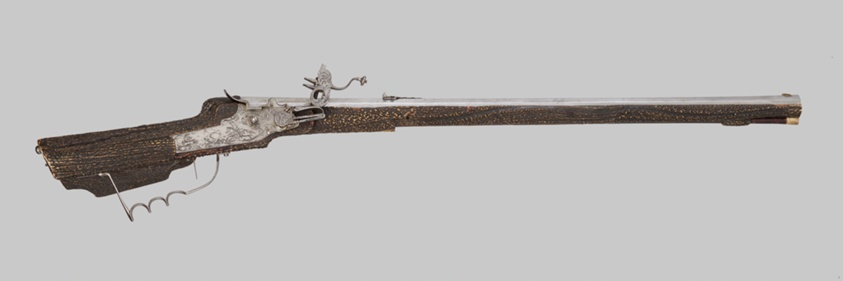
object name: Arms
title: Wheellock Rifle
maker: Elias Becker (German, Augsburg active 1633-1673); Augsburg, Germany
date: c. 1670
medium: Steel, staghorn, cherry wood, beech wood, gilt brass, copper, and enamel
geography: Augsburg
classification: firearm-long gun; arms; decorative arts; european decorative arts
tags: arms